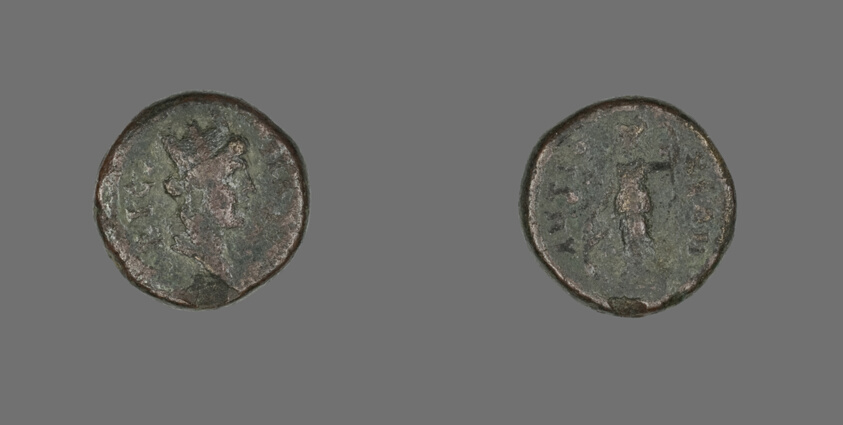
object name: Coin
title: Coin Depicting the Goddess Tyche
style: roman (ancient, style or period), ancient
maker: Roman, minted in Antioch ad Maeandron, Caria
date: 31 BCE-476 CE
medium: Bronze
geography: Rome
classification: coin; ancient art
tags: goddesses